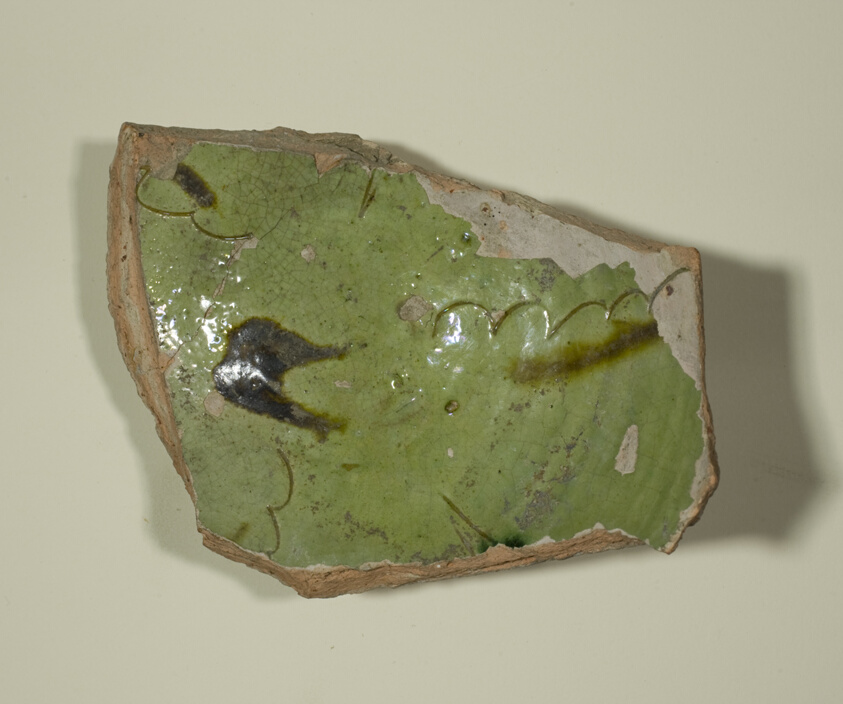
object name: Decorative Arts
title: Fragment of a Bowl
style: byzantine, european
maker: Byzantine (Greece, Corinth)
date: 13th-14th century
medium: Ceramic, sgraffito design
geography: Istanbul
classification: fragment; ceramics; vessel; bowl; asian art; decorative arts